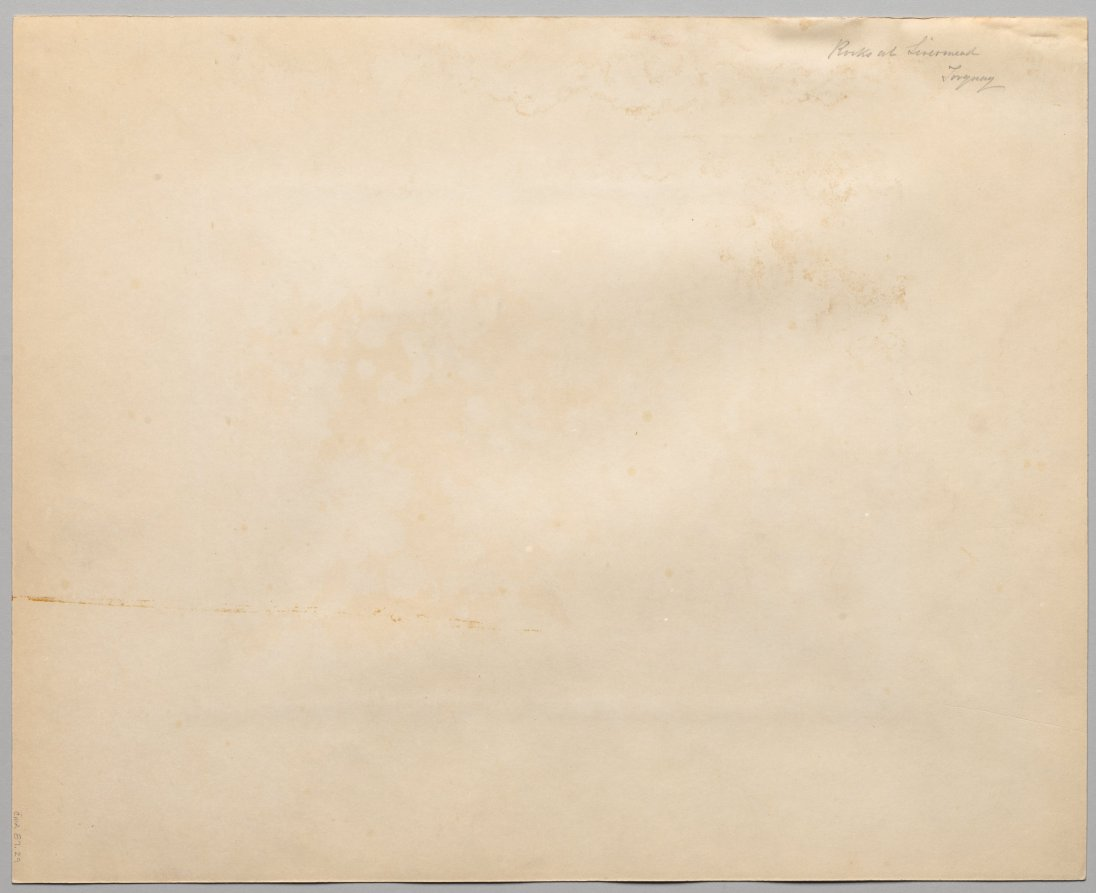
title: Rocks at Livermead near Torquay (England)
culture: England, 19th century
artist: attributed to John Dillwyn Llewelyn (British, 1810–1882)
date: c. 1852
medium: salted paper print from calotype negative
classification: Photograph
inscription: Written in pencil on verso: "Rocks at Livermead / Torquay"